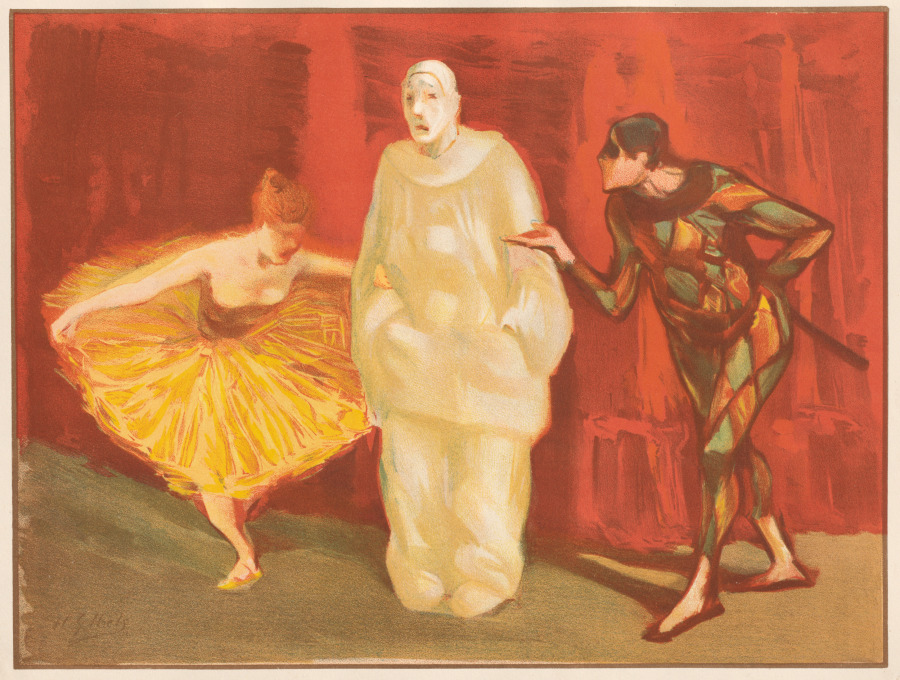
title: Pantomime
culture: France, Paris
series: L'Estampe Moderne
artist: Henri Gabriel Ibels (French, 1867–1936)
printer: Imprimerie Champenois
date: 1899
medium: color lithograph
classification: Bound Volume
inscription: In plate, lower left corner of image: H. G. Ibels; upper right corner: blindstamp of l'Estampe Moderne (Lugt 2790)